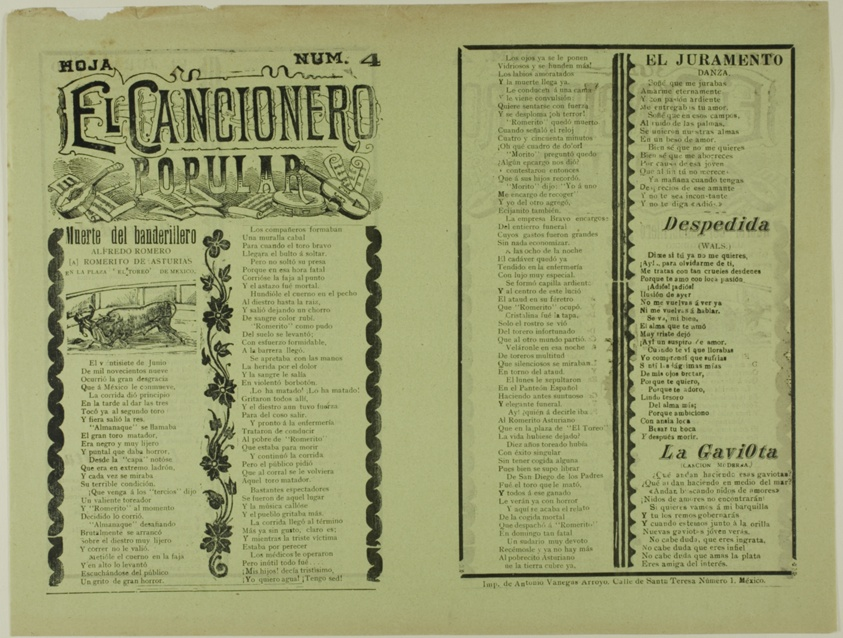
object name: Print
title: El cancionero popular, hoja num. 4 (The Popular Songbook, Sheet No. 4)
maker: Attributed to Manuel Manilla; Mexican, 1830-c. 1900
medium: Relief print on paper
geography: Mexico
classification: relief etching; print; prints and drawing